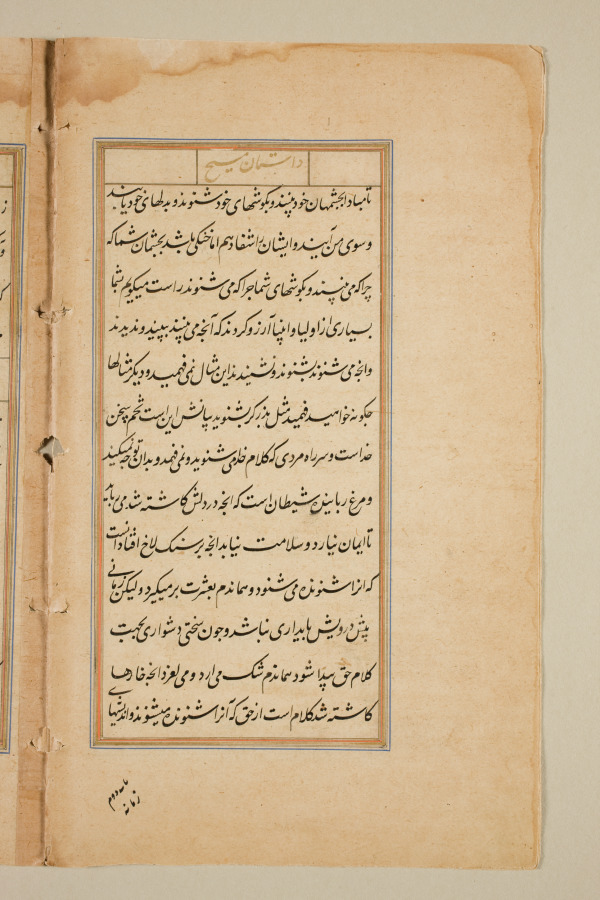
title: Text page from a Mirror of Holiness (Mir’at al-quds) of Father Jerome Xavier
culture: Mughal India, Allahabad, made for Prince Salim (1569–1627)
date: 1602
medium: Ink and gold on paper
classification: Manuscript